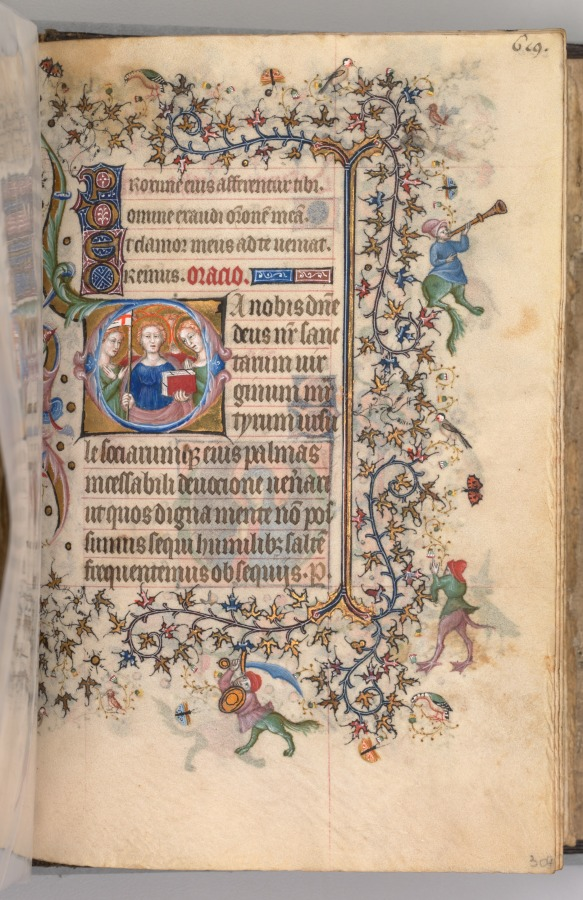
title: Hours of Charles the Noble, King of Navarre (1361-1425): fol. 303r, The Virgin Martyrs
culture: France, Paris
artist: Master of the Brussels Initials and Associates (French)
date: c. 1405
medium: ink, tempera, and gold on vellum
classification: Bound Volume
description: This precious volume was obviously highly prized by its owner, the French-born King of Navarre, who had his coat of arms painted on no less than twenty folios. Rather than directly commissioning this manuscript from a specific workshop, it seems that Charles the Noble acquired his book of hours -- perhaps ready-made for the luxury market -- while on a trip to Paris in 1404-05. A collaborative effort, six painting styles are evidenced within the pages of this codex, those of two Italians, two Frenchmen, and two Netherlanders. The painter who was responsible for the planning and decoration of the book, and who produced seventeen of the large miniatures, was a Bolognese artist known as the Master of the Brussels Initials. His principal assistant, responsible for most of the borders, was a Florentine who signed his name "Zecho" da Firenze on folio 208 verso.